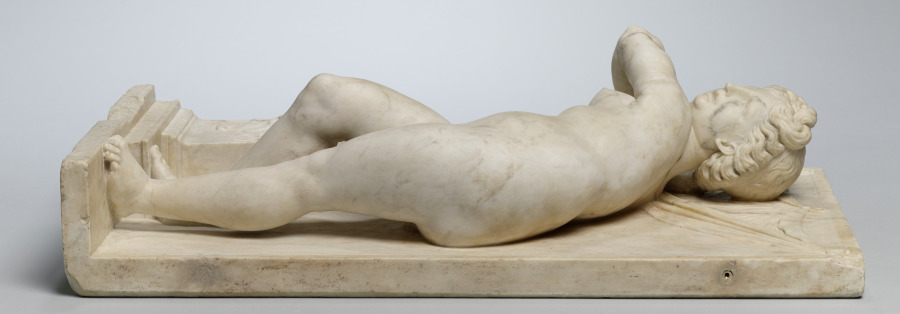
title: Dido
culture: Italy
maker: Aurelio Lombardo (Italian, 1501–1563)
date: c. 1525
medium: marble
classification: Sculpture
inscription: PVNICA SVM [DIDO ERE]XI QVAE MOENIA BYRSA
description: Artists customarily portrayed Dido as a forlorn lover abandoned by the Trojan hero, Aeneas, but here she is a conquering queen. Dido draws aside an oxhide curtain, a reference to the mythical founding of Carthage (in modern-day Tunisia, North Africa), when she was given an oxhide to demarcate granted land. By cutting it into thin strips she was able to encircle the future city. Dido was likely created for display in a studiolo, a place of study featuring refined works of art appreciated by humanist scholars and aficionados during the Renaissance.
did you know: Dido’s nudity and hairstyle are allusions to ancient Greek images of Aphrodite.